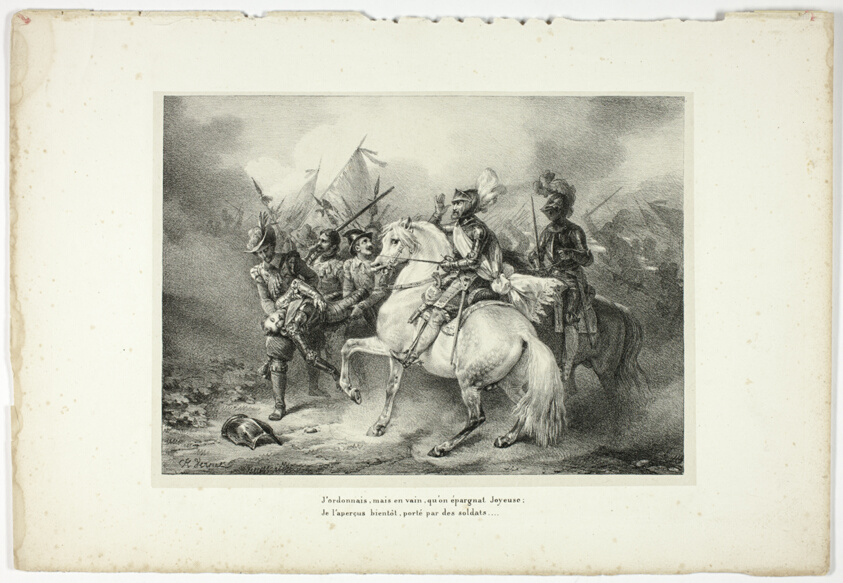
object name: Print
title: J'ordonnais, mais en vain, qu'on épargnat Joyeuse...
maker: Horace Vernet (French, 1789-1863); poem by Voltaire (French, 1694-1778); published by Dubois (French, 18th-19th century)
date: 1825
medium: Lithograph in black on gray chine, laid down on ivory wove paper (chine collé)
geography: France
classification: lithograph; print; prints and drawing